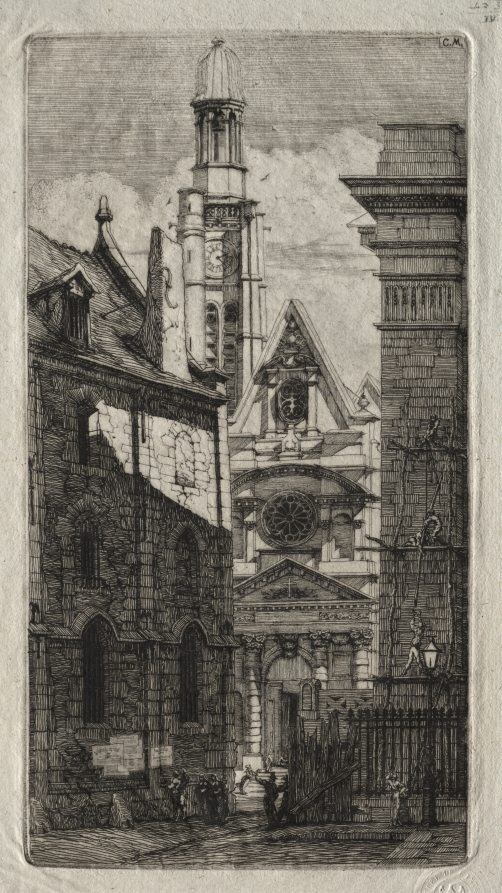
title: Etchings of Paris: Church of St. Stephen of the Mount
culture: France, 19th century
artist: Charles Meryon (French, 1821–1868)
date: 1852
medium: etching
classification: Print